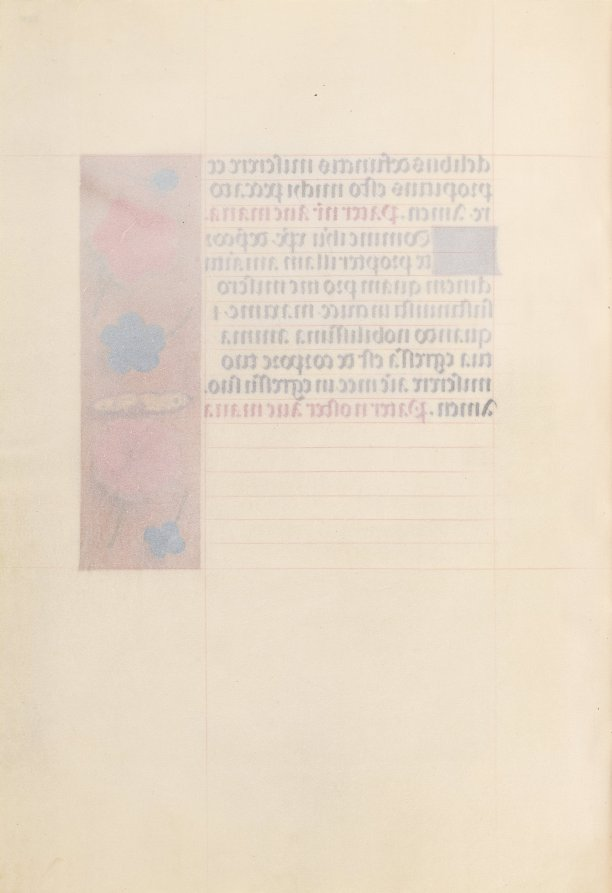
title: Hours of Queen Isabella the Catholic, Queen of Spain: Fol. 266v, St. Bernard before the Virgin and Child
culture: Flanders, Ghent and Bruges, late 15th century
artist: Master of the First Prayerbook of Maximillian (Flemish, c. 1444–1519)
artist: and Associates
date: c. 1500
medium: ink, tempera, and gold on vellum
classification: Bound Volume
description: This manuscript was illuminated by a circle of at least five highly organized manuscript painters active in the Flemish cities of Ghent and Bruges. The principal illuminator was Alexander Bening, who painted the majority of the book's miniatures. Manuscripts produced by this circle of artists are renowned for the decoration of their borders, which typically feature a rich variety of realistically-painted flowers, birds, and butterflies. This prayer book, called a book of hours, was intended not for a cleric, but for the private devotions of a lay person-in this case, Isabella the Catholic, Queen of Spain (1451-1504). Isabella's coat of arms embellishes the book's frontispiece. It is unlikely that the book was commissioned by the Queen herself; rather, she probably received it as a diplomatic gift from someone courting her patronage, perhaps Cardinal Francisco Jimenez de Cisneros. A Franciscan friar, Jimenez was dependent upon Isabella for his advancement, first to the post of Queen's confessor in 1492, and then to Archbishop of Toledo in 1495.